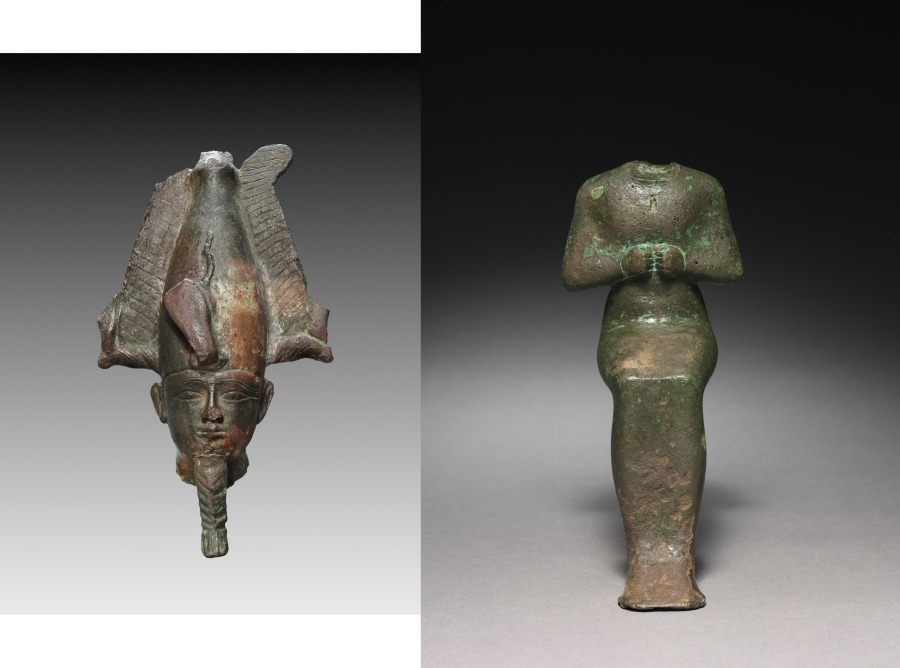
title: Head of Osiris and Statuette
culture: Egypt, Late period (715–332 BCE), Dynasty 26 or later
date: 664–525 BCE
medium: bronze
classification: Sculpture